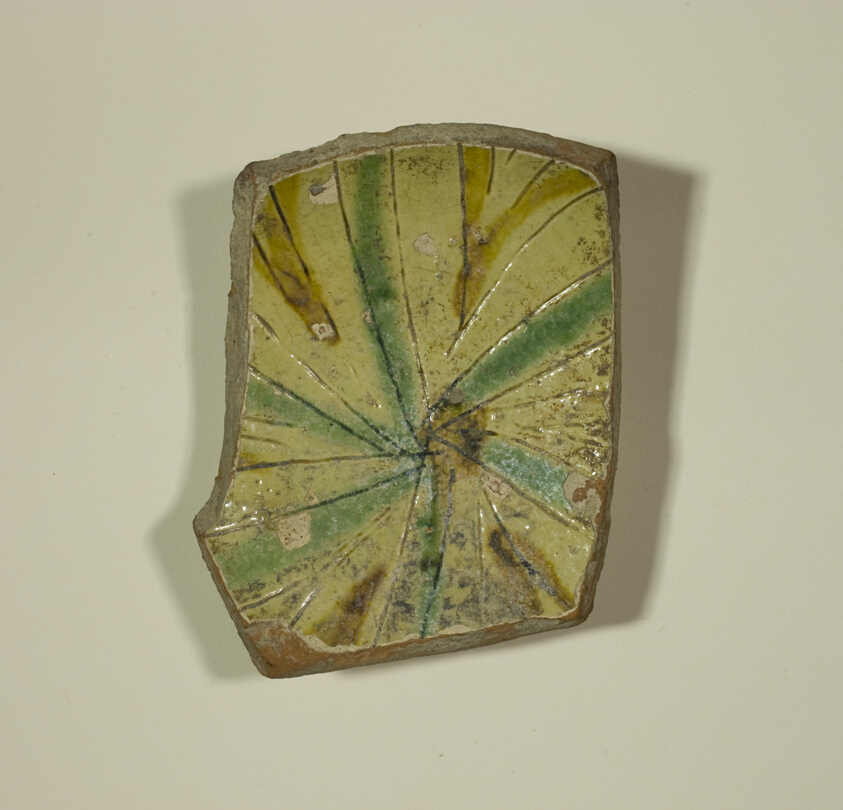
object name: Decorative Arts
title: Fragment from the Base of a Bowl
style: byzantine, european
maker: Byzantine; Serres, Greece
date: 13th-14th century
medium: Glazed terracotta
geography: Istanbul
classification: fragment; ceramics; bowl; vessel; asian art; decorative arts